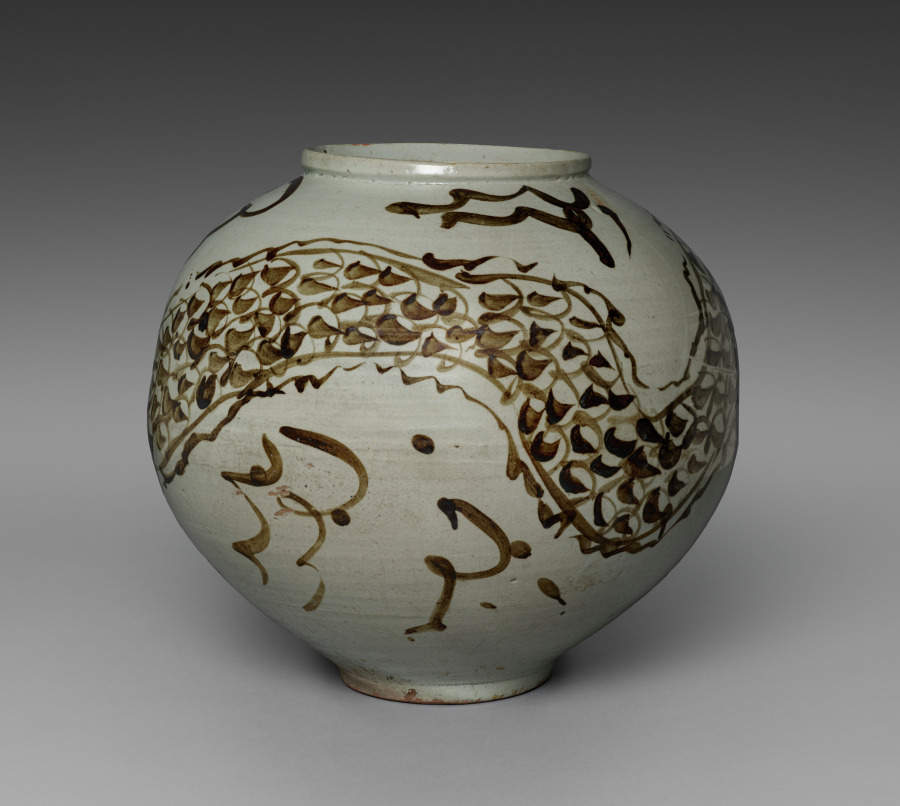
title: Jar with Dragon and Clouds Design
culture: Korea, Joseon dynasty (1392–1910)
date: late 1600s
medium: porcelain with underglaze iron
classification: Ceramic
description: In traditional Korean art, dragons were used as an emblem of royalty. Over centuries, the ways of depicting this powerful mythical creature varied in response to artistic trends and socioeconomic changes. Here, the artist imagined with free-flowing calligraphic brushstrokes a whimsical dragon with bulging eyes who wraps his scaled body around the vessel. This piece was acquired from the London Gallery in Tokyo, Japan. Its owner, Tajima Mitsuru (born about 1936) is regarded as one of the pioneering Japanese art dealers to cultivate lasting relationships directly with collectors and museums in the United States.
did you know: A mythical creature believed to have the power to make rain, the dragon is a prominent symbol of rulers in premodern East Asia; the image of dragons was used exclusively for the king's paraphernalia.